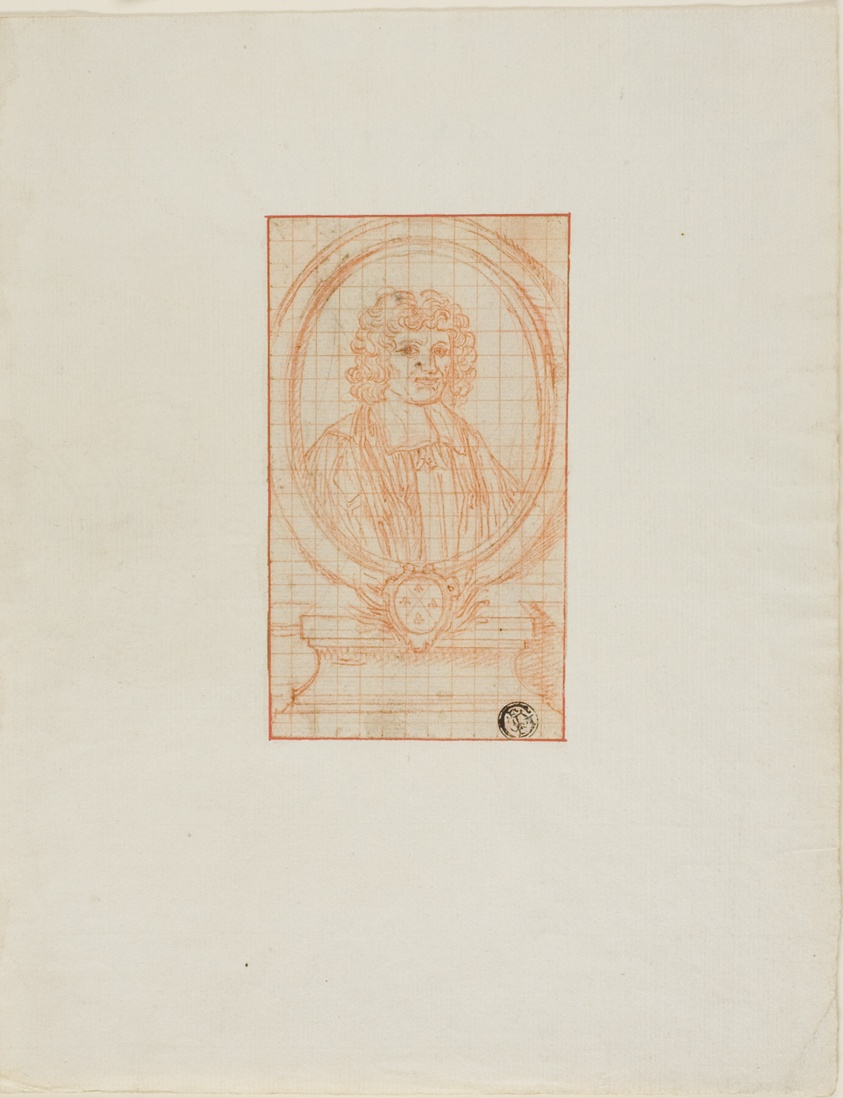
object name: Drawing and Watercolor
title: Medallion Portrait of a Clergyman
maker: Attributed to Bernard Picart; French, 1673-1733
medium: Red chalk, squared in red chalk, on ivory laid paper, laid down on ivory laid paper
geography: France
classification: chalk; drawings (visual works); prints and drawing